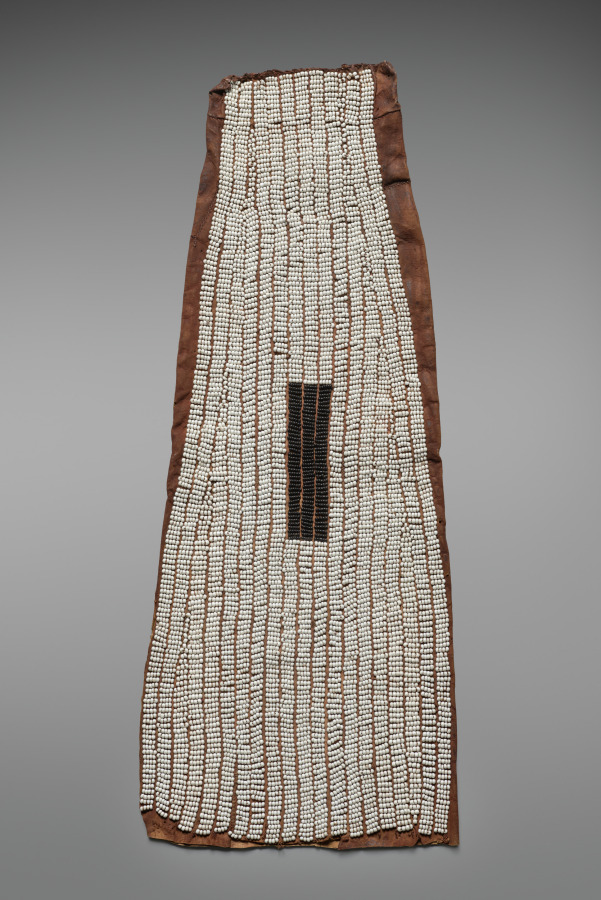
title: Royal ceremonial headdress (umnqwazi)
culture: Africa, Southern Africa, South Africa, Southeast Cape Region, Unknown female Xhosa-style maker(s)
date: 1800s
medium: Glass beads, sinew, and hide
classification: Textile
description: Elite Xhosa women once wore beaded garments like this on festive occasions. Made almost completely from imported Venetian or Bohemian glass beads, they were overt status symbols. Imported beads functioned as money for the Xhosa between circa 1770 and 1829. These garments’ female maker carefully selected beads of the highest quality, uniform in color, shape, and size. Made in the same shape as the pendant, a swallowtail-shaped apron (CMA 2010.206) worn under the skirt completed the ensemble.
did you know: The beads to make an ensemble like this cost several cattle in the early 1800s, an amount most couldn't afford.